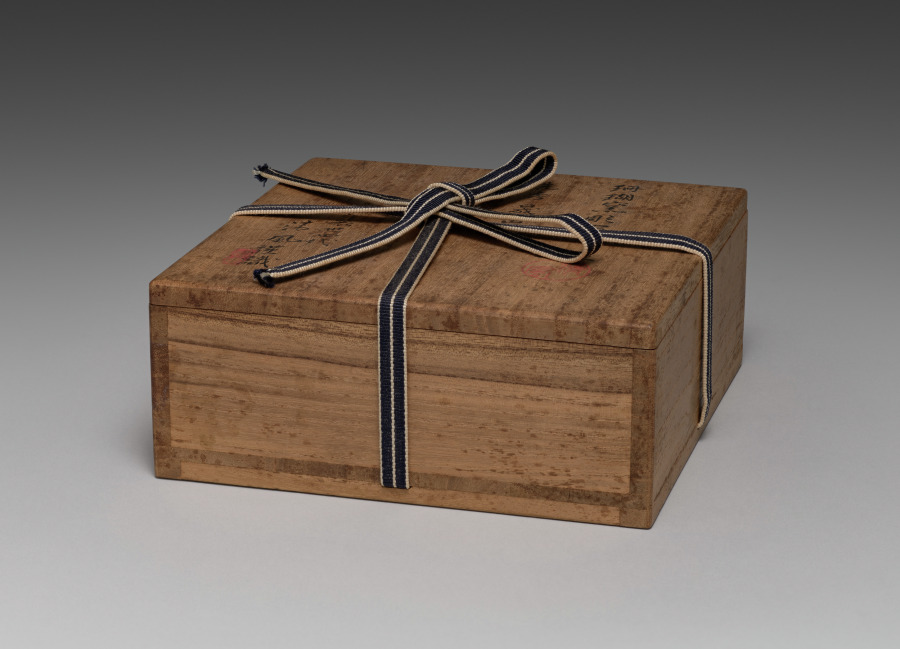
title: Dish with Carp in Waves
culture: Japan, Meiji period (1868–1912)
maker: Seifū Yohei III (Japanese, 1851–1914)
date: 1893–1914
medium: Porcelain with incised designs, iron oxide, and red glaze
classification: Ceramic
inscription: 清風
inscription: 清風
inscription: 清風盧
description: The exterior of this low, wide dish with flared foot is covered with a red coral glaze. Its interior is white with incised designs, and the rim is decorated with brown iron oxide. The primary design occupies the flat bottom of the bowl and is bound within a single band. It is of a carp swimming vigorously against roiling waves with frothy crests moving in multiple directions; the water just above the fish’s head is beginning to form a whirlpool. A closer look at the fish’s face reveals that it somewhat resembles that of a dragon. It is possible that the motif is meant to be a carp who jumps over the waterfall and transforms into a dragon, who flies into the sky. The iconography symbolizes the transformative experience of striving to one’s utmost and achieving the impossible against tough odds. Originating in China, the narrative’s visual representation as well as its meaning crossed the ocean to Japan, where it often appeared on items gifted to those celebrating pivotal successes in life, such as obtaining elevated status in one’s work or graduating from an academic program.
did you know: The inside walls of the bowl are decorated with three abstract flowers, each represented with five circles ringing a central circle, from which leafy tendrils stretch in both directions .